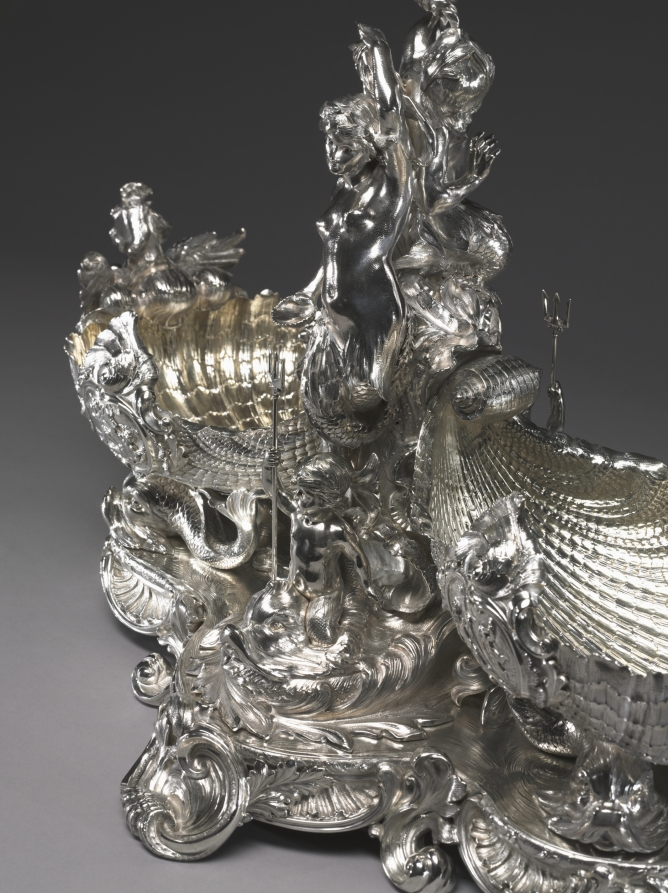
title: Centerpiece from the Nereid Service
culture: England, late 19th-early 20th century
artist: Goldsmith's & Silversmith's Company (British)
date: c. 1900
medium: silver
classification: Silver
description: Originally thought to have been made by the early 19th-century London silversmith Paul Storr because it had been marked with spurious Storr hallmarks, more recent scholarship has revealed that this service, representing the triumph of Great Britain on the high seas through the allegorical images of Grecian nymphs (nereids), was actually made to display at the 1900 world's fair in Paris. Such nationalistic fervor permeated design at the turn of the 20th century, especially in the years leading up to the First World War, when national pride was brought to its heels in Europe through a devastating conflict.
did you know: This centerpiece is actually the product of many hands since the Goldsmiths' and Silversmiths' Company operated as a cooperative of silversmiths who sold their work through the company.